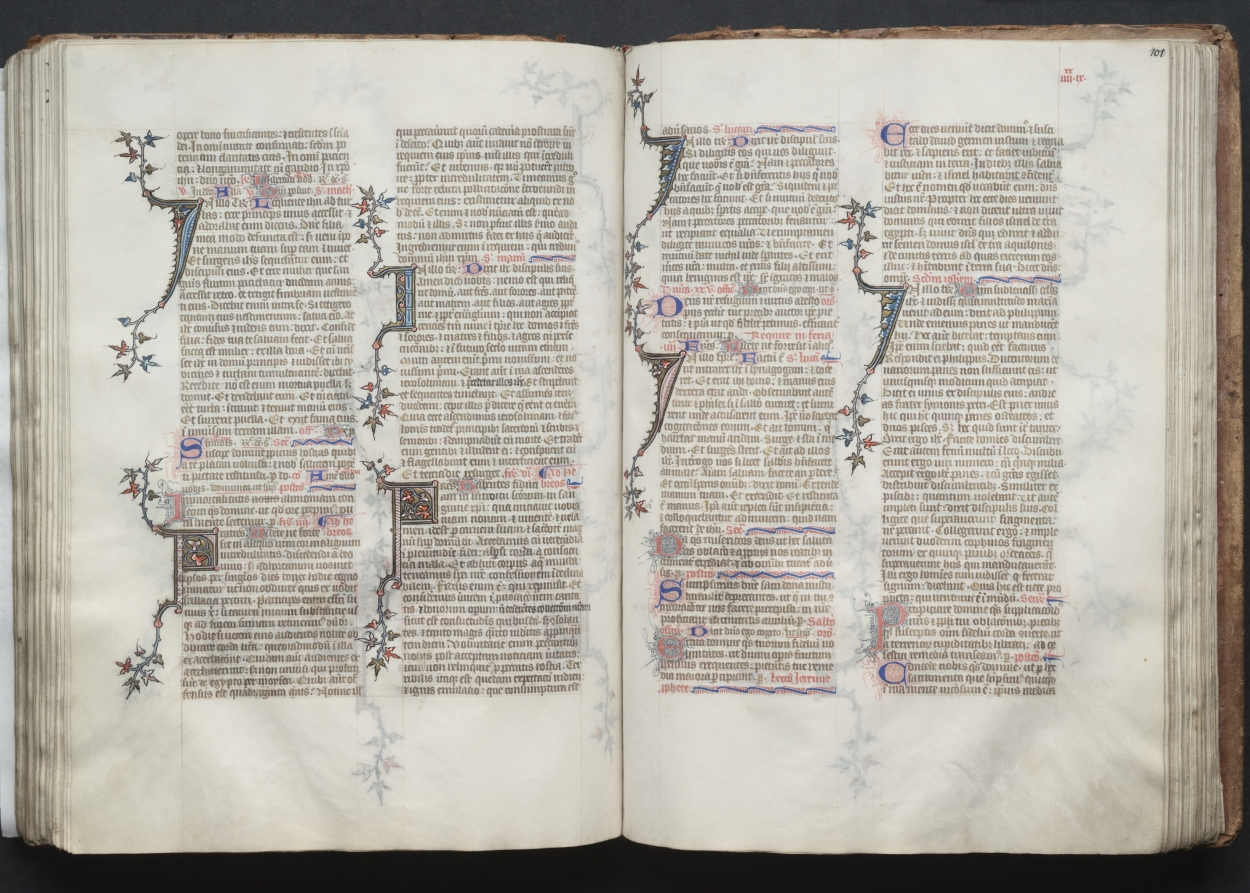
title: The Gotha Missal: Fol. 101r, Text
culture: France, Paris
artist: Master of the Boqueteaux (French)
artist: and Workshop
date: c. 1375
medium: ink, tempera, and gold on vellum; blind-tooled leather binding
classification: Bound Volume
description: The style and quality of this manuscript's decoration is typical of deluxe Parisian books made for aristocratic or royal patrons. Most of the book's decoration appears to be the work of the Master of the Boqueteaux, an artist active at the court of King Charles V (died 1380). His style was apparently shared by a number of book illuminators working in and around Paris. It is very possible that the Gotha Missal belonged to Charles V, but is not provable because the manuscript has no royal portraits and lacks a colophon. Given the book's magnificent decoration, however, it would seem that it was produced for a Valois prince, if not for the king himself. The manuscript receives its name from the German dukes of Gotha, its later owners.